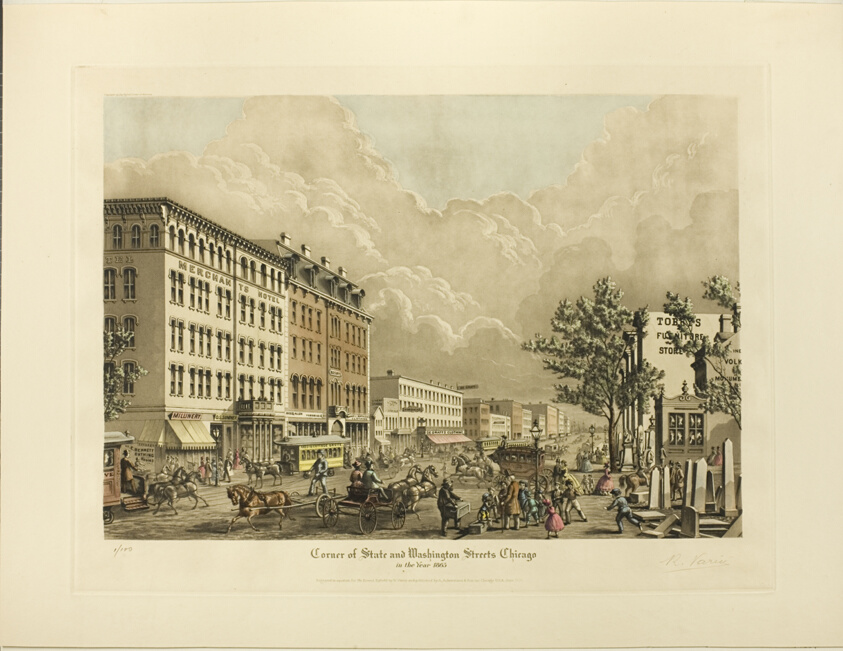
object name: Print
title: Corner of State and Washington Streets, Chicago, in the Year 1865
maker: Raoul Varin (French, 1865-1943)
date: published June 1928 (1865 depicted)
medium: Aquatint and etching in brown, with hand-coloring, on cream wove paper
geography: France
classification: aquatint; print; prints and drawing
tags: Chicago